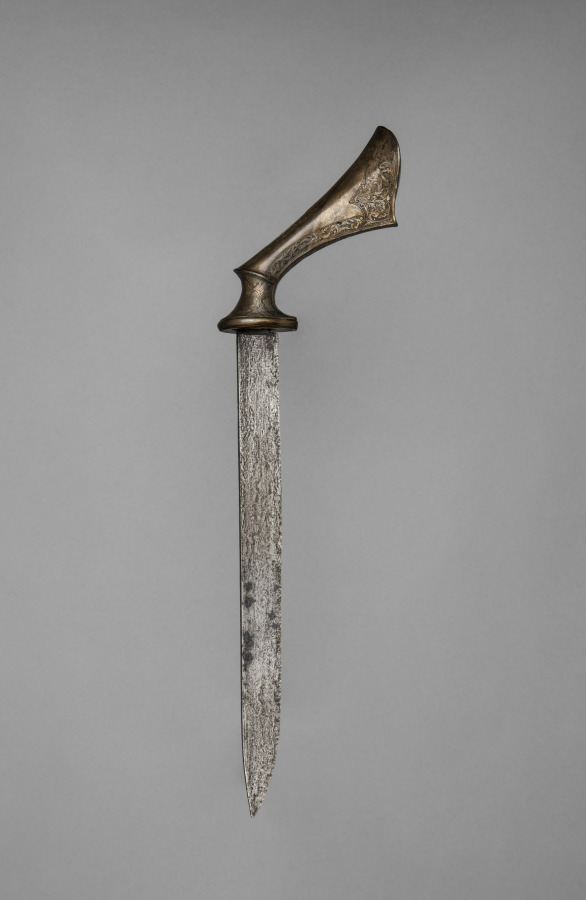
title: Knife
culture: Sumatra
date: 1500s–1800s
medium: Blade: steel; handle: copper alloy with silver gilt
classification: Arms and Armor